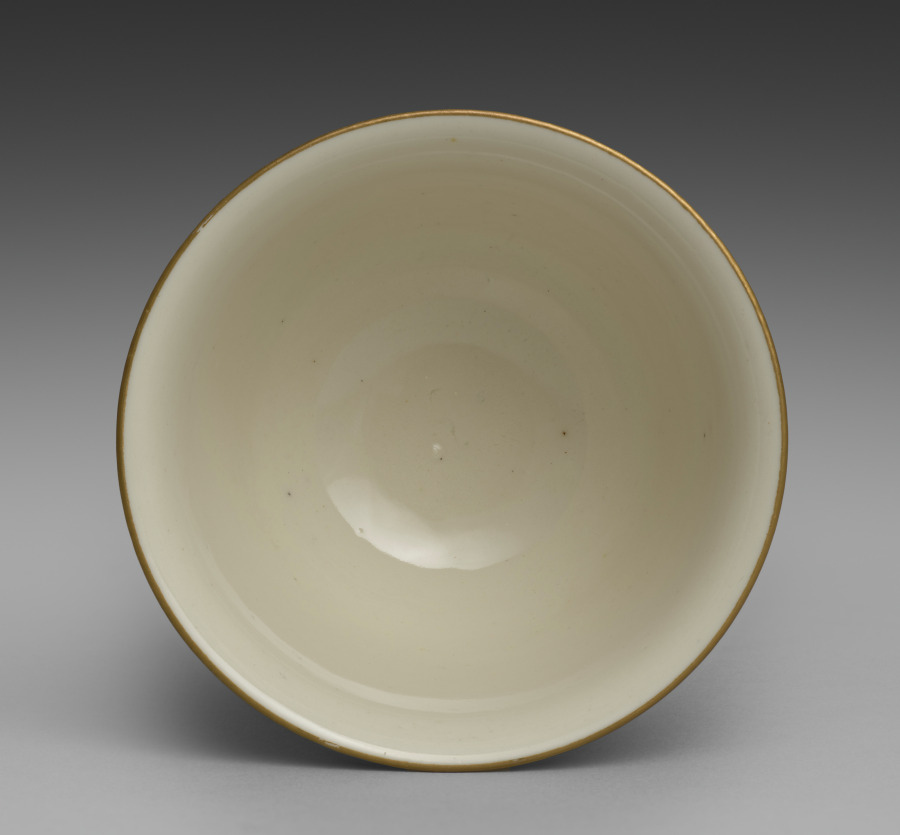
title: Drinking Cup from Dining Set with Plum Blossoms and Cracked-Ice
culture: Japan, Meiji period (1868–1912)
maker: Seifū Yohei II (Japanese, 1844–1878)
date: c. 1875–78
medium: Porcelain with molded designs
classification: Ceramic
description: Each item in this set has a delicate low-relief design of flowering plum branches over scattered, intersecting lines meant to resemble the cracked-ice surface of a frozen body of water and is signed on the base in gold pigment. While Yohei II produced many fine works in underglaze blue, like those produced by Kiyomizu Shichibei, he also made works in quite different styles later in his career, from the early 1870 s. In 1873, he was appointed purveyor to the Industrial Center of Kyoto Prefecture, a designation associated with Kyoto’s efforts to reach an international market through the port of Kobe; and from 1875 until his death, he was involved in national-level projects to present Japanese ceramics across the world. It was during this period that Yohei III was apprenticed to Yohei II, and it has been suggested that this set may in fact be an early example of Yohei III’s work, which he signed with his teacher’s name. Decorated with flowers resembling Japanese textile motifs, the set calls to mind the design of Yohei II’s pair of vases with plum blossoms in the Victoria and Albert Museum. Here, the elaborate trees created for a formal public exhibition setting have been translated into the approachable blossoms of the genteel domestic environment. While the designs are consistent across the pieces, each raised flower petal and pistil and each incised line in the ice was done by hand, so the cups, bowls, and dishes are similar yet unique. The bottoms of two boxes once identified the set’s owner, but the information has been deliberately obscured with black ink. However, inscriptions still visible appear to indicate two occasions, once at the end of July 1886 , and once again in June 1916 , when parts of the set were requested from Hokura in Niigata Prefecture. The location corresponds to a neighborhood in the present-day city of Jōetsu. The surname Tsuji 辻 also appears on a paper tag affixed to one of the box cloths. Future research may possibly reveal more about their provenance. A vase by Yohei III in a private collection combines the formal grandeur of the Yohei II vases in the Victoria and Albert Museum with the gentler design of this dining set, placing flowering plum trees against soft, scalloped-edge clouds resembling those in golden screens.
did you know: The dining wares have a creamy white coloration that the four boxes containing them identify as Korean in style.